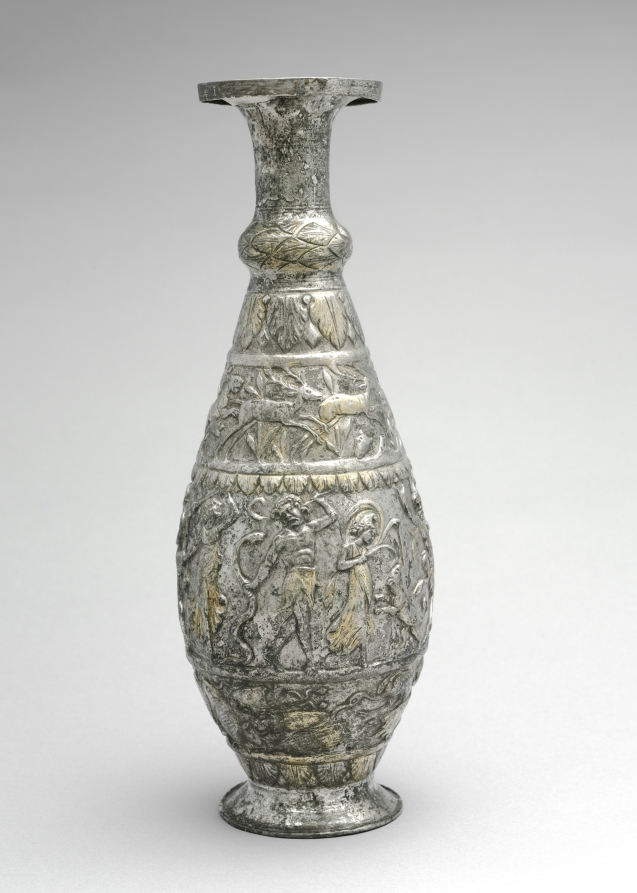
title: Ewer (Pitcher) with Game, Seafood, and Wine Scenes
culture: Byzantium, Syria(?), Byzantine period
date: late 300s CE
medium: silver with traces of gilding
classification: Metalwork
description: This magnificent pitcher, called a ewer, was almost certainly meant for serving wine in the dining room of a wealthy home. On its surface are images in three bands representing the expected bounty of the hunt. Deer pursued by a lioness and hares chased by dogs appear in the top band, signifying the wealth of game the owner hoped to have on the family table. In the lowest band are edible sea creatures, while the center features the merry followers of the Roman wine god Bacchus (Dionysos in Greek).